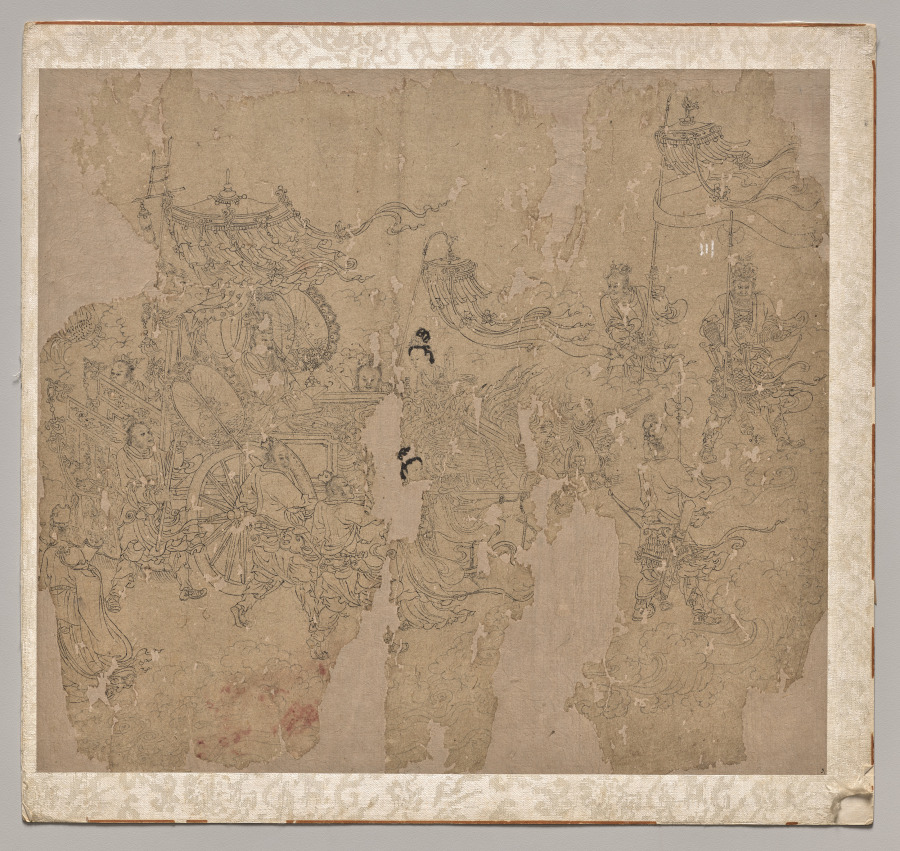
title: Album of Daoist and Buddhist Themes: Procession of Daoist Deities: Leaf 3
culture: China, Southern Song dynasty (1127-1279)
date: 1200s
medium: Album, ink on paper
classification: Painting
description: This extraordinary album has 50 paintings on a variety of religious subjects. They were likely created by several master craftsmen to share with studio apprentices as models for fulfilling commissions. The Jade Emperor and the Daoist pantheon make up the first 26 leaves. On this leaf, the fourth in the album, the Jade Emperor 玉帝 rides over a cloud in his chariot surrounded by his retinue. The next 14 leaves portray the Buddhist Ten Kings of Hell administering punishments to the dead. The third section, called “Clearing the Mountains,” features divine soldiers, led presumably by the deity Erlang Shen 二郎神, fighting undesirable creatures.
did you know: A female attendant holds a tray with a rocky formation, which provides a clue to the Emperor's identity.